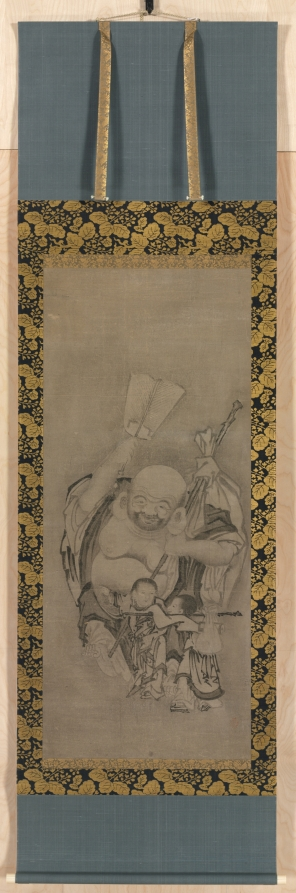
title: Hotei with Daoist Immortals: Hotei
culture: Japan, Edo period (1615–1868)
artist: Kyūseki Tomonobu (Japanese, 1653–1721)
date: late 1600s-early 1700s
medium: triptych of hanging scrolls: ink on paper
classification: Painting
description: Hotei was a Chan (Japanese: Zen) monk living in China during the 900s who, in the 1300s, became a legendary figure in Japan. At that time a popular cult praising him sprang up, extending beyond Zen to other religious communities. This rare triptych embraces a central Zen icon with flanking Daoist images, thereby suggesting the compatibility-rather than the exclusivity-of these two creeds. Hotei also enjoys popularity in Japan as a kind of genre, or folk figure, which explains his mirthful expression in Japanese paintings. The Daoist figures in contrast appear eccentric and foreign-looking, in keeping with Daoist lore. When these paintings came to the museum their appearance was compromised by poor quality textile mountings, and cracked paper surfaces deserving of restoration. The fact that these scrolls constituted an integral set that properly had to be shown as a unit heightened the need to stabilize their condition and improve their presentation for museum visitors. A complete remounting of each scroll occurred following the cleaning of the paper surfaces and the repair of the lifting surface areas. No inpainting was done, thereby preserving the original ink values and brushstrokes.